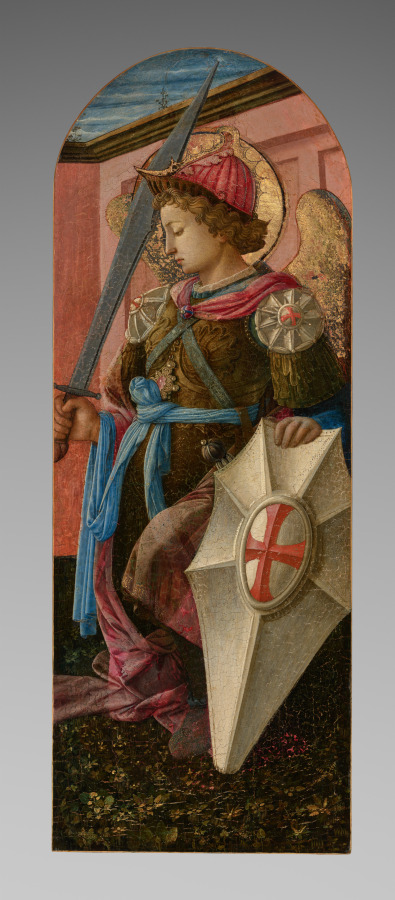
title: Panel from a Triptych: The Archangel Michael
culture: Italy, Florence, 15th century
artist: Fra Filippo Lippi (Italian, c. 1406–1469)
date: 1458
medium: tempera on wood panel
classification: Painting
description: These panels depicting Saints Anthony the Abbot and Michael originally flanked a central scene of the Madonna and Child with Angels, now lost, to form a triptych. Giovanni di Cosimo de’Medici of Florence commissioned the ensemble in 1457 as a gift to Alfonso V of Aragon. Fra Filippo Lippi, a Carmelite friar and one of the great masters of early Renaissance Florence, depicted realistic, weighty figures in a three-dimensional space using a system of linear perspective, inspired partly by Masaccio’s Brancacci Chapel, and reflected in the background architecture. Saint Anthony the Abbot rejected all earthly possessions in pursuit of a contemplative life in the desert. He is generally regarded as the founder of monasticism and is depicted wearing a monk’s habit. Saint Michael’s sword and shield refer to his role as heaven’s defender against evil.